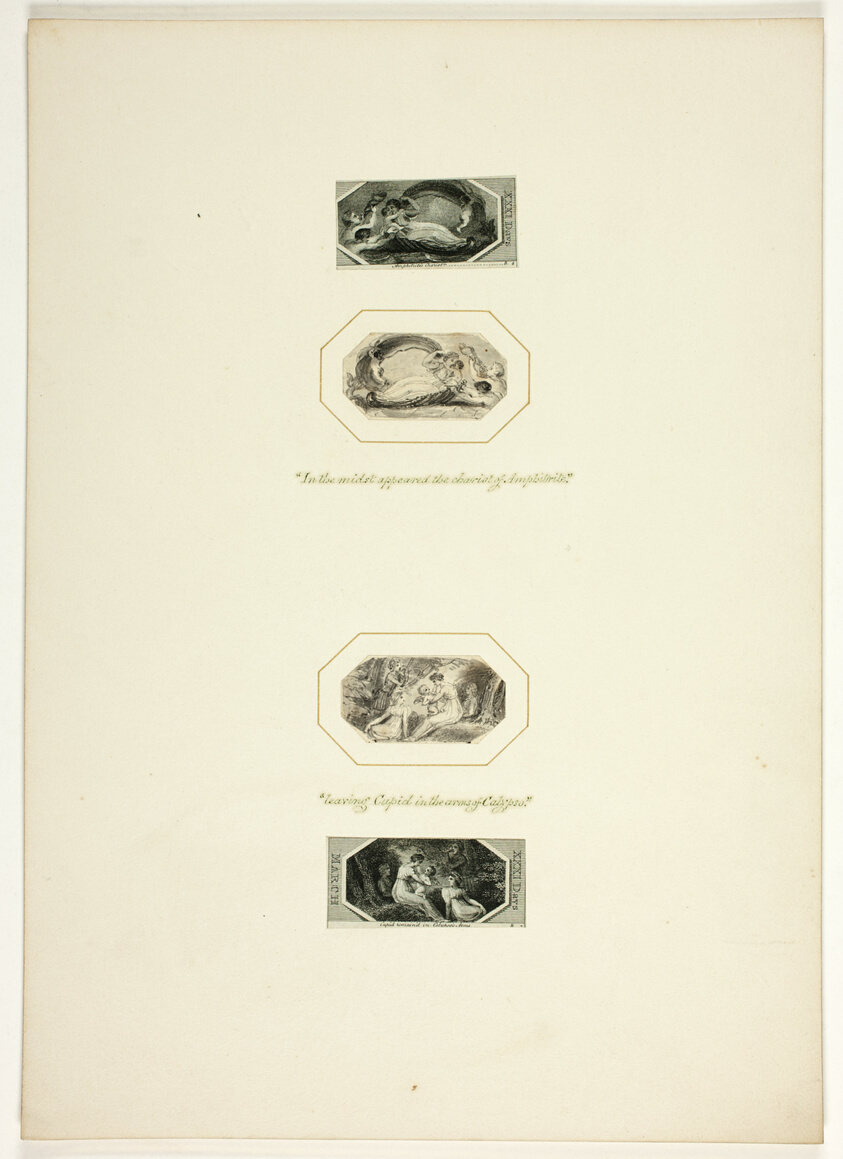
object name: Drawing and Watercolor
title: Study for a plate from Telemachus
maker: Thomas Stothard (English, 1755-1834)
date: c. 1797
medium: Ink wash on paper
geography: England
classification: ink or chalk wash; drawings (visual works); prints and drawing